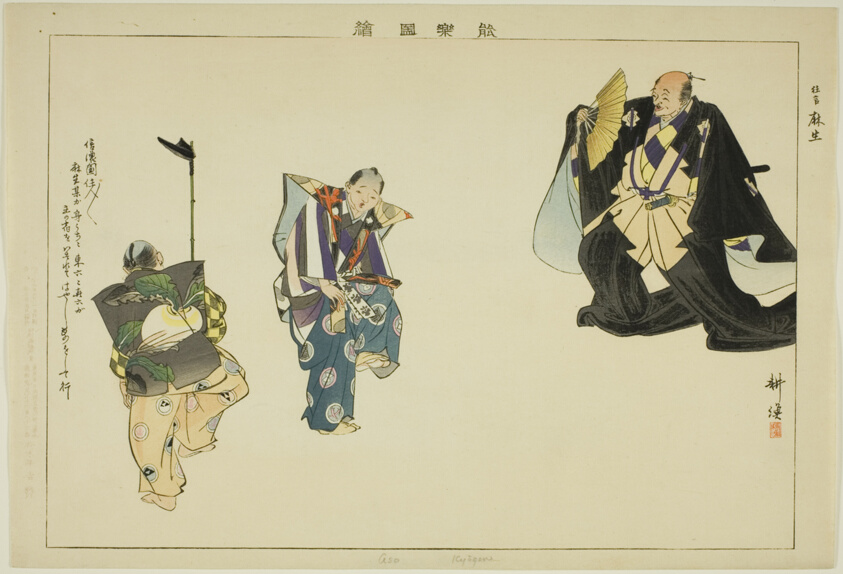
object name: Print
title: Aso (Kyogen), from the series "Pictures of No Performances (Nogaku Zue)"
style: Japanese (culture or style)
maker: Tsukioka Kogyo; Japanese, 1869-1927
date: 1898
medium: Color woodblock print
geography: Japan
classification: woodblock print; print; asian art